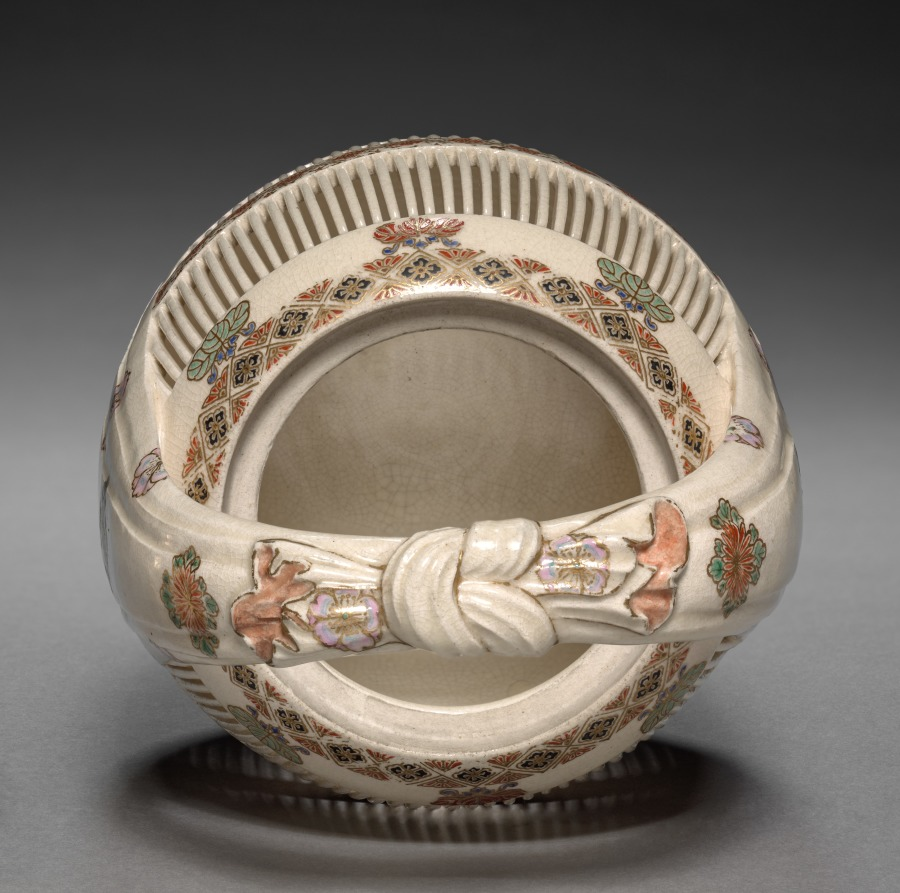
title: Jar: Satsuma Ware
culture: Japan, Edo period (1615–1868)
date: early to mid-1800s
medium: pottery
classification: Ceramic